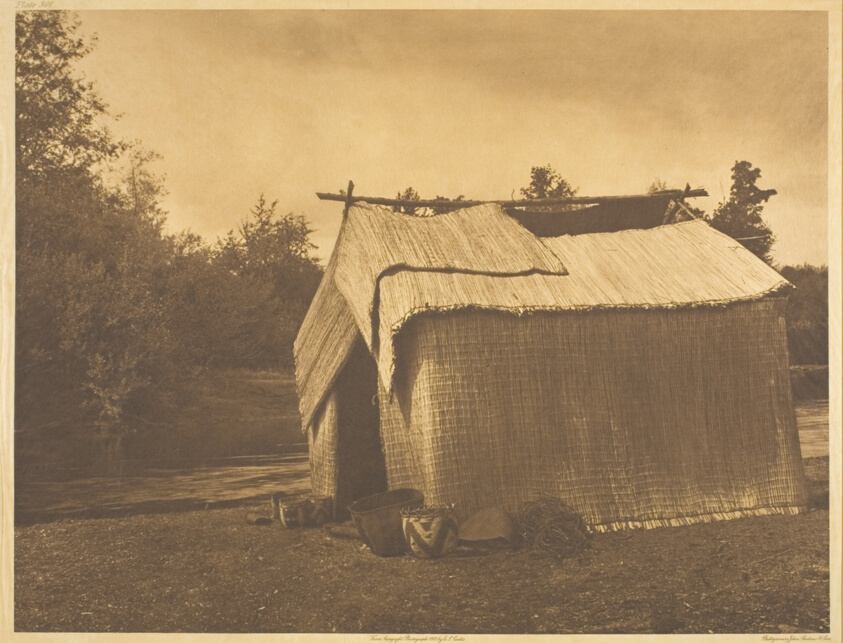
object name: Photograph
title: A Mat House - Skokomish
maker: Edward S. Curtis (American, 1868–1952)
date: 1912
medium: Photogravure, plate 301 from "The North American Indian, Volume 9" (1913)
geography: United States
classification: photogravure; photomechanical process; photography; photograph